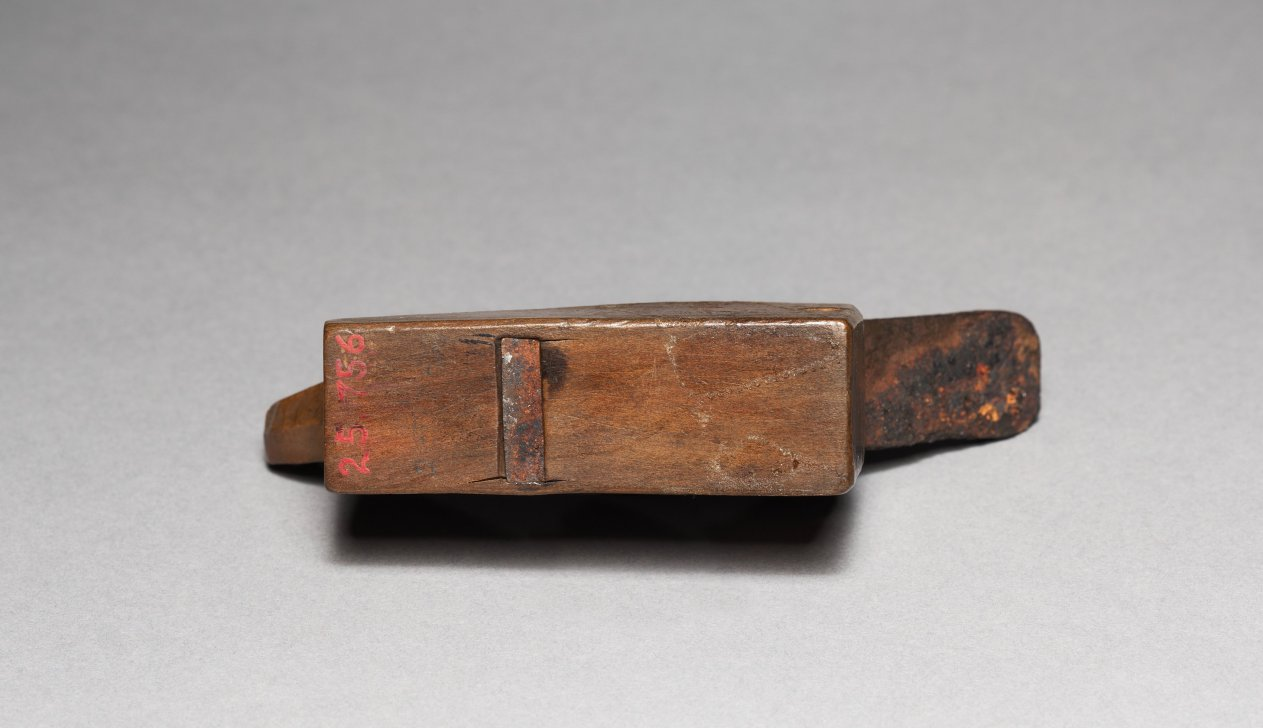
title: Plane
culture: Europe, 18th century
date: 1700s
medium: wood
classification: Tool